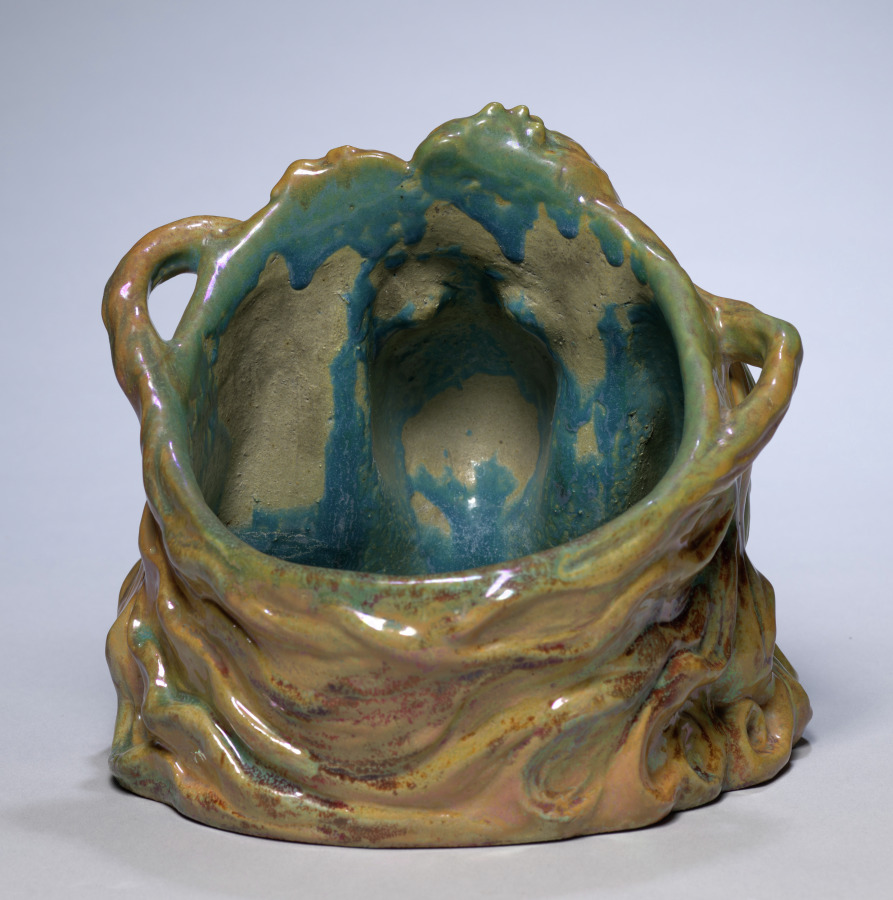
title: Vase in the Form of a Woman's Head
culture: France, late 19th Century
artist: Emile Muller (French, 1889)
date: c. 1895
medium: stoneware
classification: Ceramic